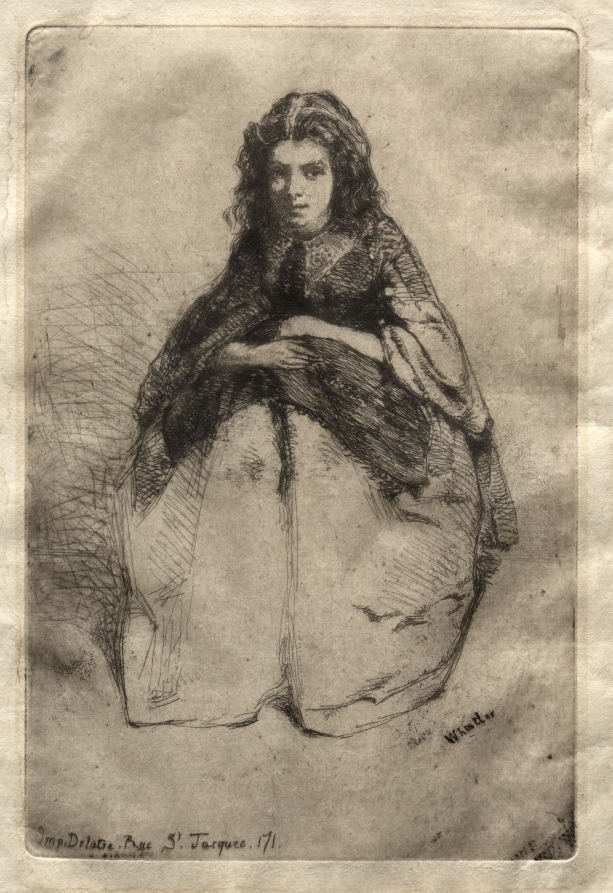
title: Fummette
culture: America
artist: James McNeill Whistler (American, 1834–1903)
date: 1858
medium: etching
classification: Print